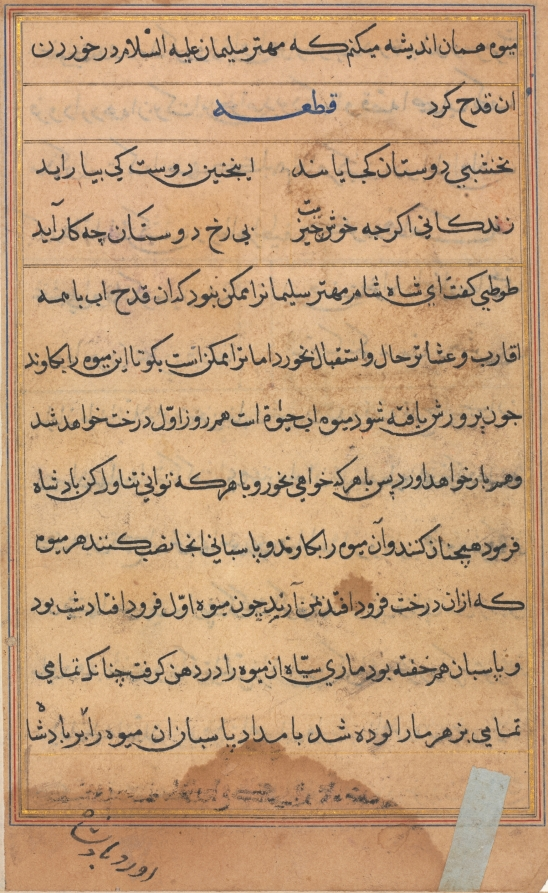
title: Page from Tales of a Parrot (Tuti-nama): text page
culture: Mughal India, court of Akbar (reigned 1556–1605)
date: c. 1560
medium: gum tempera, ink, and gold on paper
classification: Painting